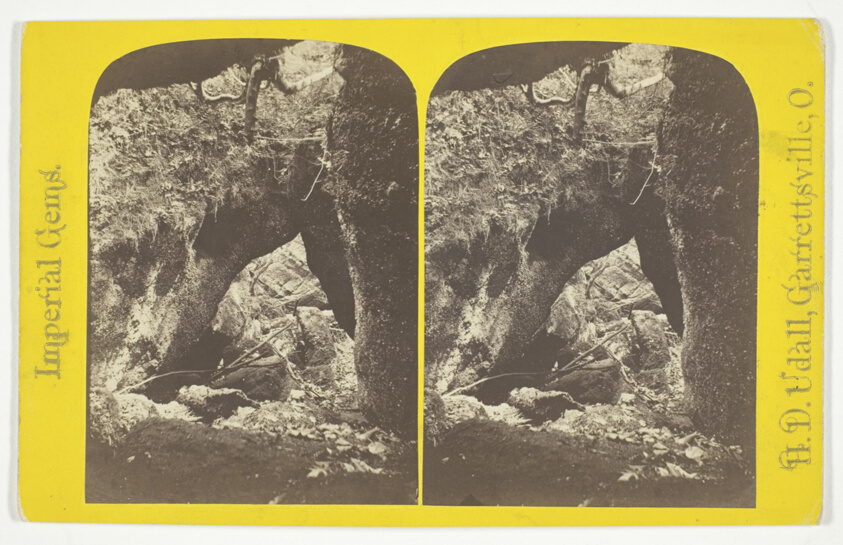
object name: Photograph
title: Cupid's Gateway, No. 14 from the series "Imperial Gems"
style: 19th century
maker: H. D. Udall; American, active late 19th century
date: 1875/99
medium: Albumen print, stereo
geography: Ohio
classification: photography; photograph